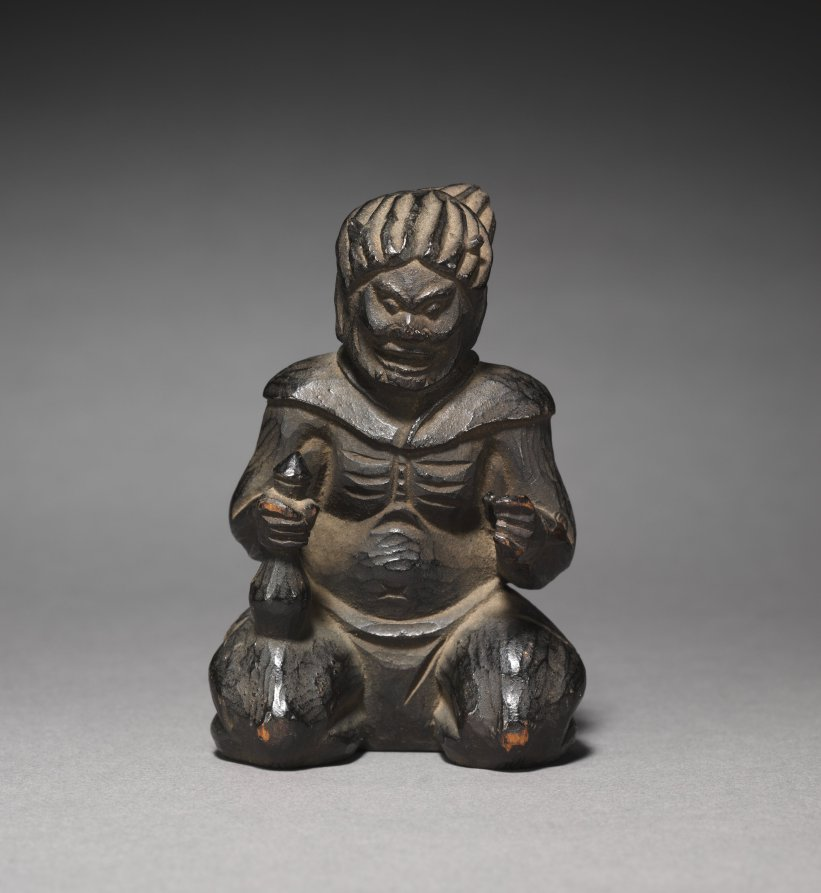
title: En no Gyōja with Zenki and Kōki (Kōki)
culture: Japan, Edo period (1615–1868)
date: 1615–1868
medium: wood and paint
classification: Sculpture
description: This is one of a trio of figures identified as Enno Gyoja and his two attendants, Zenki and Koki. The set follows the iconography of Shugendo, the traditional mountain ascetic practice in Japan. Enno Gyoja is depicted as a hermit-monk, seated on a rock attached to a modern base. He holds a staff in his right hand and a sutra in the left. The two attendants take the form of half-human, half-demonic figures and are regarded as a married couple.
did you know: Koki carries a sake bottle.